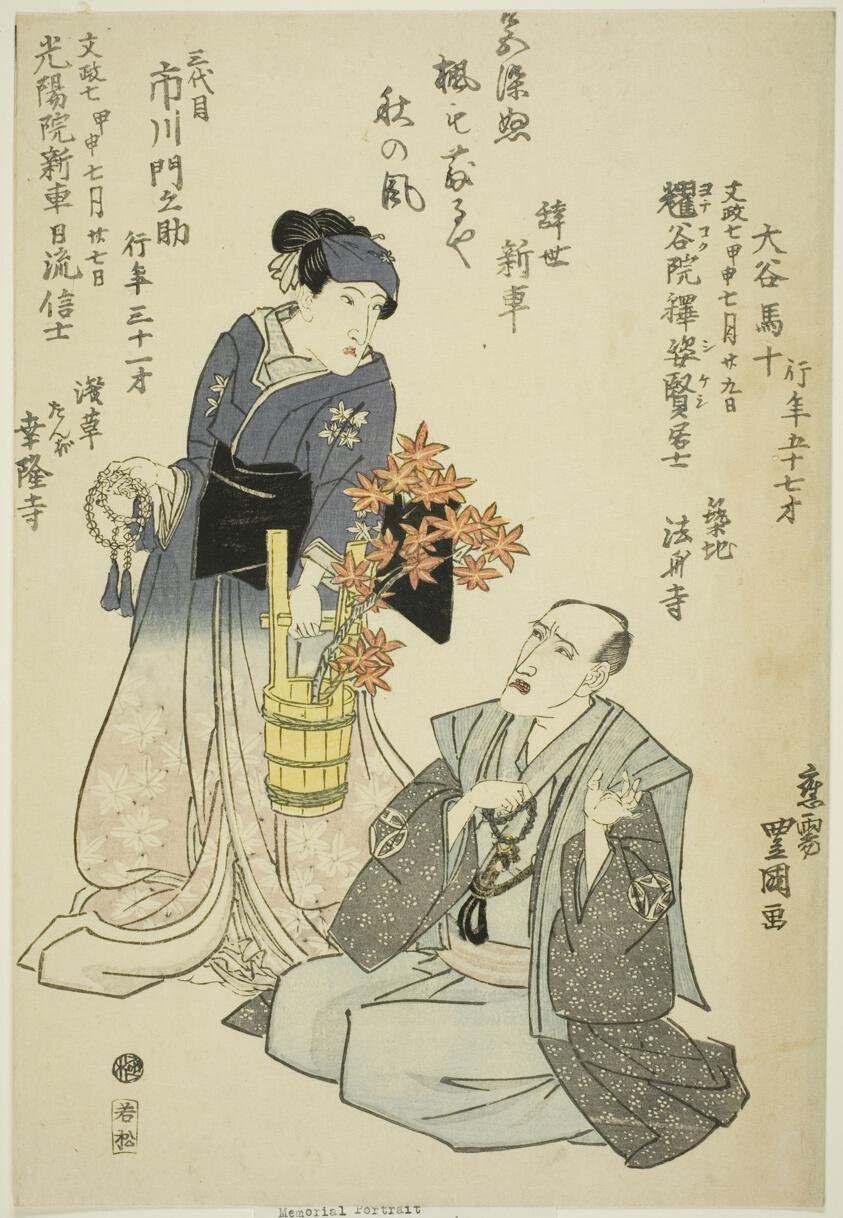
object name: Print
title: Memorial Portraits of the Actors Otani Baju II (right) and Ichikawa Monnosuke III (left)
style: Japanese (culture or style)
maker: Utagawa Toyokuni I 初代 歌川 豊国; Japanese, 1769–1825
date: 1824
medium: Color woodblock print; oban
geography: Japan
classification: print; asian art